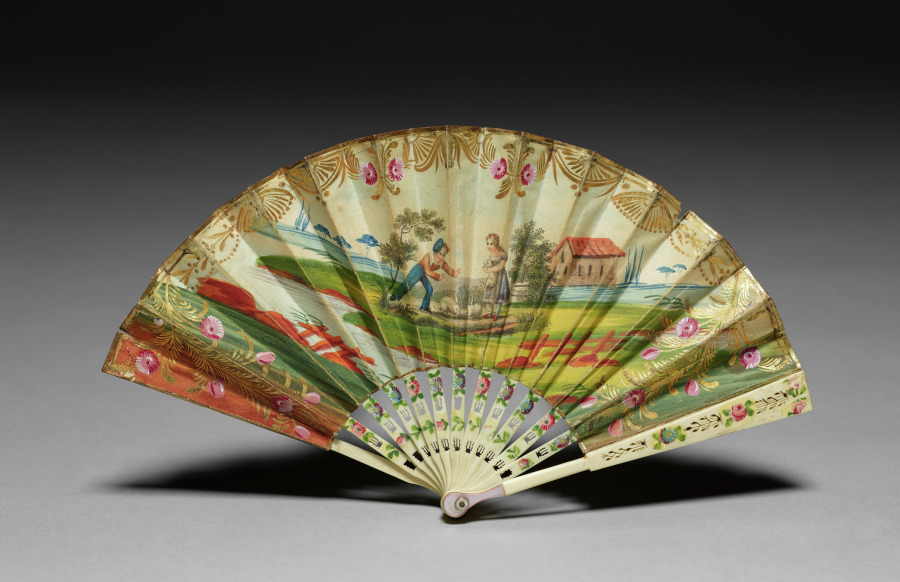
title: Child's Fan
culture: France, late 18th or early 19th century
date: late 1700s or early 1800s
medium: bone, mother-of-pearl, gilt and painted paper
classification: Miscellaneous